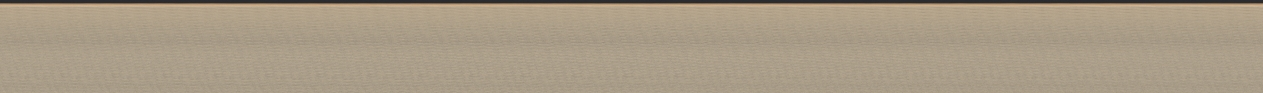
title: Mt. Taibo in the Style of Wang Meng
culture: China, Ming dynasty (1368–1644)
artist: Du Qiong (Chinese, 1396–1474)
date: 1442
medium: handscroll; ink and light color on paper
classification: Painting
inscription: Artist's inscription, signature, and 11 seals: [1 seal] Tung-yüan chai. Huang-ho-shan-ch'iao [Wang Meng] painted a painted called T'ai-po Mountain. Its brushwork is superior and admirable, which is very close to Yu-ch'en [Wang Wei, 699-759]. The cleverness of its composition, the maple groves and rustic temples, the inaccessible ravines and autumnal plateaus, the periolous peaks and strange rocks, etc., all seem to be so natural. The paper is only a little over eight feet, but the landscape has the range of a thousand miles. Once you open and note the contents, it is as if one were roaming among the mountain peaks enveloped in mist and clouds, and forgot the dusty world. When I first saw this, I was so mixed with excitement and joy that I could not take my hands off the painting. So I put it on the table, and tried my best to imitate it, forgetting sleeping and eating for about three months before it was completed. Although I do not dare to tread in the footsteps of Huang-ho shan ch'iao, I took great pains to capture his spirit in composition and colors. I do not know whether it would pass the judgment of the experts. On the fifteenth day of the fifth month, the seventh year of the Cheng-t'ung year [1442], inscribed by Tung-yüan, Tu Chiung. [2 seals] Yung-chia; Ching-chieh ming-men. [8 seals on painting] Tung-yüan chai; Ching-chieh ming-men; Yung-chia; Tu Ch'iung yin; Tung-yüan (repeated 5 times). trans. WKH/LYSL 3 colophons and 7 additional seals: 1 colophon and 2 seals of Chou Ting (1401-1487); 1 colophon and 2 seals of Wu K'uan (1435-1504); 1 colophon, dated 1655, and 2 seals of Lan Ying (1585-after 1664).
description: When a Chinese painter "imitated" a painting by a past master, the intention was never to produce an exact copy. Du Qiong, the Ming painter from Suzhou, is a case in point. The painting style of this handscroll is actually closer to that of Huang Gongwang (1269–1354) than to the style of Wang Meng (about 1301–1385). Both masters were active during the previous dynasty and are among the so-called Four Great Masters of the Yuan dynasty (1279–1368). In this painting, the interplay of styles, including Du Qiong's own, contribute to an inner dimension that is more than visual. Mt. Taibo is located in the province of Zhejiang and is known for its scenic beauty. In this scroll, however, it is not depicted literally. The image is an ideal representation of mountains in southeastern China.